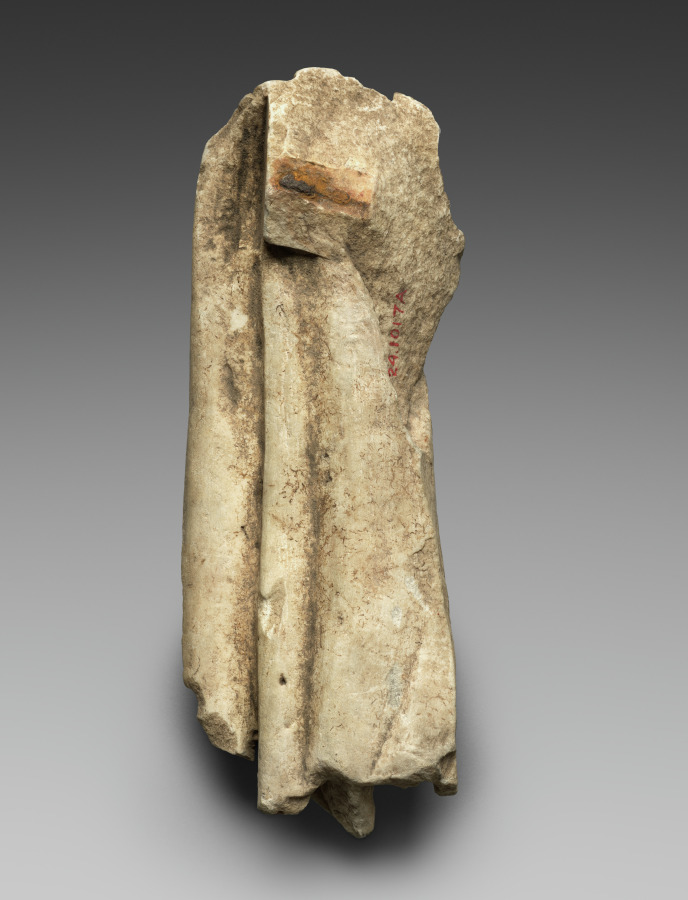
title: Torso of Apollo: Fragment of Goat Skin Drapery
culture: Italy, Roman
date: c. 100–200 CE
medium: marble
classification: Sculpture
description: This fragment is part of an ancient statue that depicts the mythical god Apollo.